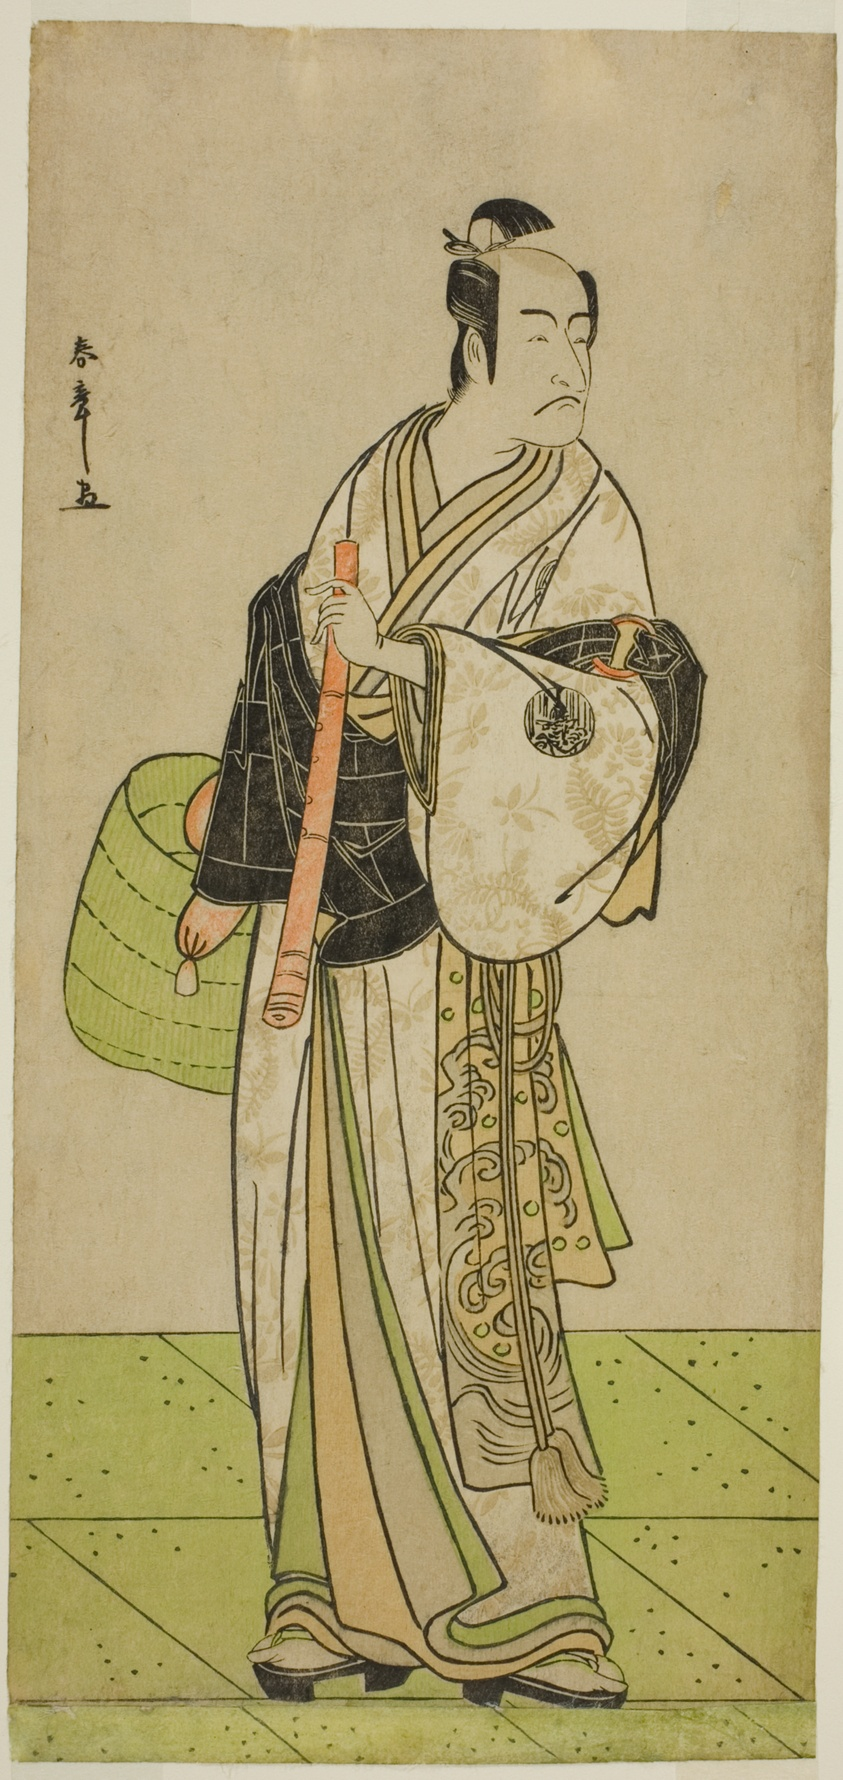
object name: Print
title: The Actor Ichikawa Ebizo as Kudo Suketsune Disguised as a Komuso in the Play Waka Murasaki Edokko Soga, Performed at the Ichimura Theater in the First Month, 1792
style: Japanese (culture or style)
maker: Katsukawa Shunsho 勝川 春章; Japanese, 1726-1792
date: c. 1792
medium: Color woodblock print; hosoban; center sheet of triptych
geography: Japan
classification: woodblock print; print; asian art